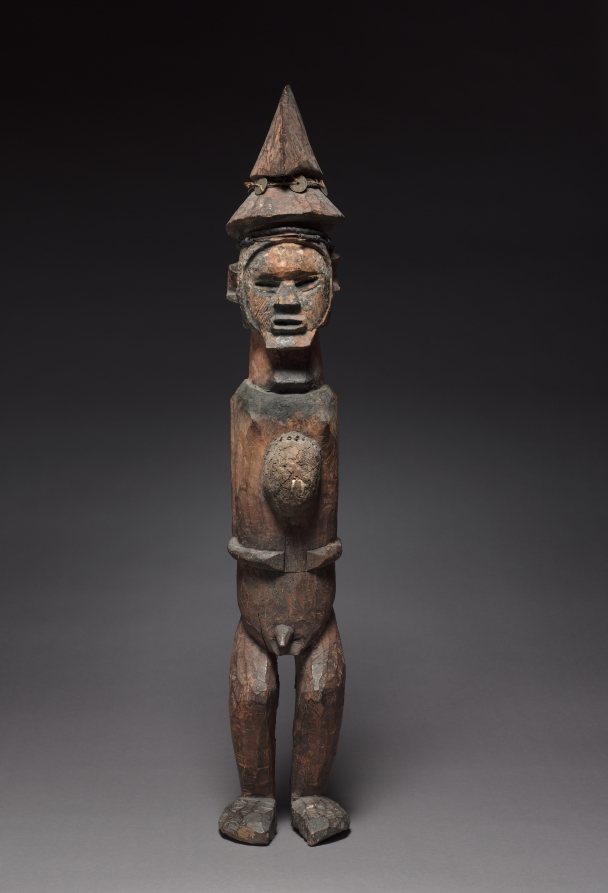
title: Male Figure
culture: Africa, Central Africa, Republic of the Congo (most likely) or Democratic Republic of the Congo, Teke-style maker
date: late 1800s-early 1900s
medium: Wood, resin, iron, copper, plant fiber, cloth, glass beads, coins, antelope horns, and cowrie shells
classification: Sculpture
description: This exceptionally large Teke figure is well preserved and holds a medicine package partly buried in an abdominal cavity. Its size suggests that it stood at the service of a larger group of people and that its powers extended beyond the limits of a village. Its scarification marks and beard identify it as representing a chief or another dignitary.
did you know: The coins on the figure’s hat were those used in the Belgian Congo.